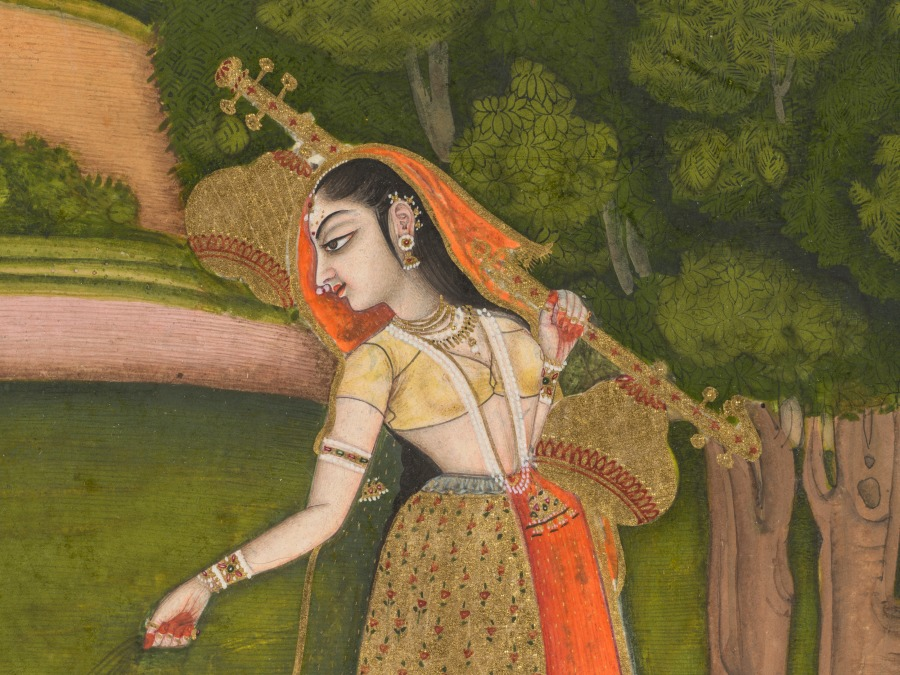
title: Todi Ragini, from a Ragamala Series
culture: Eastern India, Bengal, Murshidabad, 18th century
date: c. 1755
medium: Gum tempera and gold on paper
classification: Painting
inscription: identified at top in gold: ragini todi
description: Ragamala paintings were recognized as being associated with a season and time of day. Evoking a late morning in spring, here a young woman beguiles deer from the woodlands with her music to prevent them from destroying the crops in the field. The saturated hues and romantic idealization of the scene continue idioms begun in the Mughal court that were disseminated to regional centers of patronage such as Murshidabad. The inscription at the top of this page identifies the name, ragini todi, in Arabic script, which suggests that this ragamala series was made for a Muslim patron.